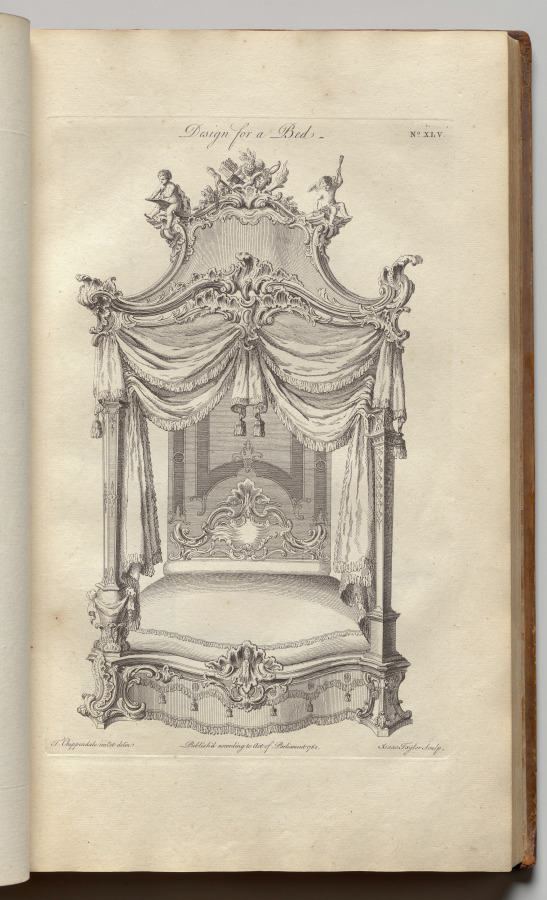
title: The Gentleman and Cabinet-Maker's Director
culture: Britain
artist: Thomas Chippendale (British, 1718–1779)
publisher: T. Becket & P. A. de Hondt (British)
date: 1762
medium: Paper, leather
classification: Bound Volume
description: Through his designs for furniture and architectural elements, Thomas Chippendale became one of the most influential tastemakers of the 1700s. He published three editions of The Gentleman and Cabinet-Maker’s Director (1754, 1755, and 1762), which sold widely in Britain, Ireland, and America. This rare French version of the third edition demonstrates his effort to spread his designs for both naturalistic and neoclassical decoration even wider across Europe.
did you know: Fewer than fifteen copies, including this one, of the French edition of Thomas Chippendale’s famous book of designs, are known to exist.